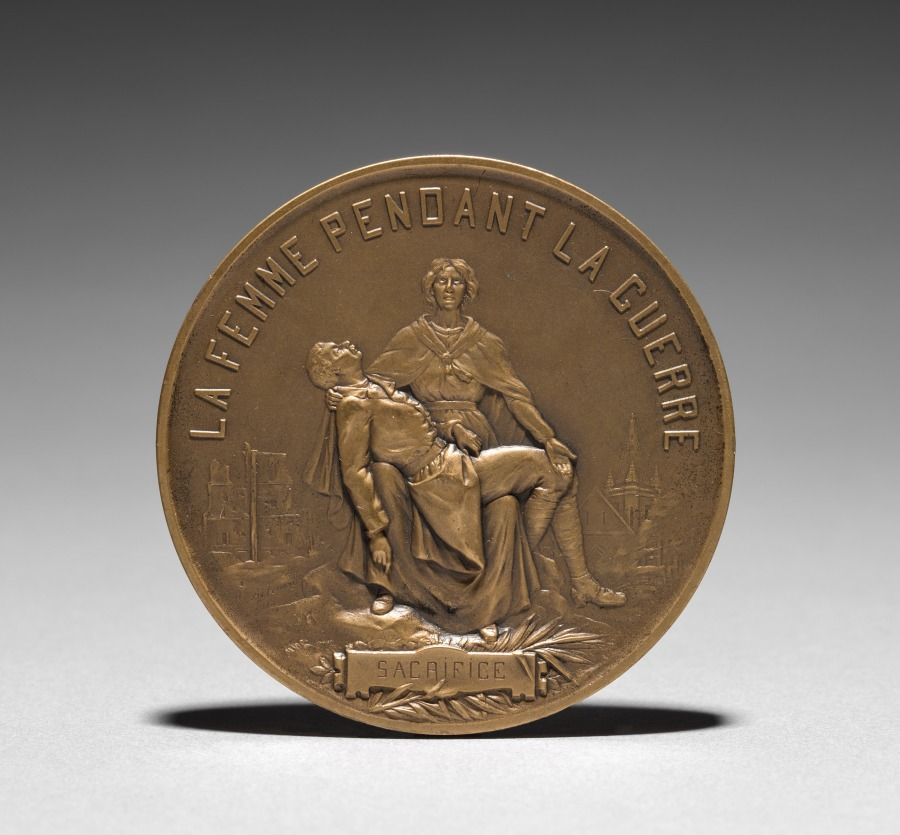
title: Medallion (obverse)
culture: France, 19th-20th century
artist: Henri Emile Allouard (French, 1844–1929)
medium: bronze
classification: Metalwork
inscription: "Sacrifice. La femme pendant la Guerre" (woman during the war); signed: "H. Allouard 1918."